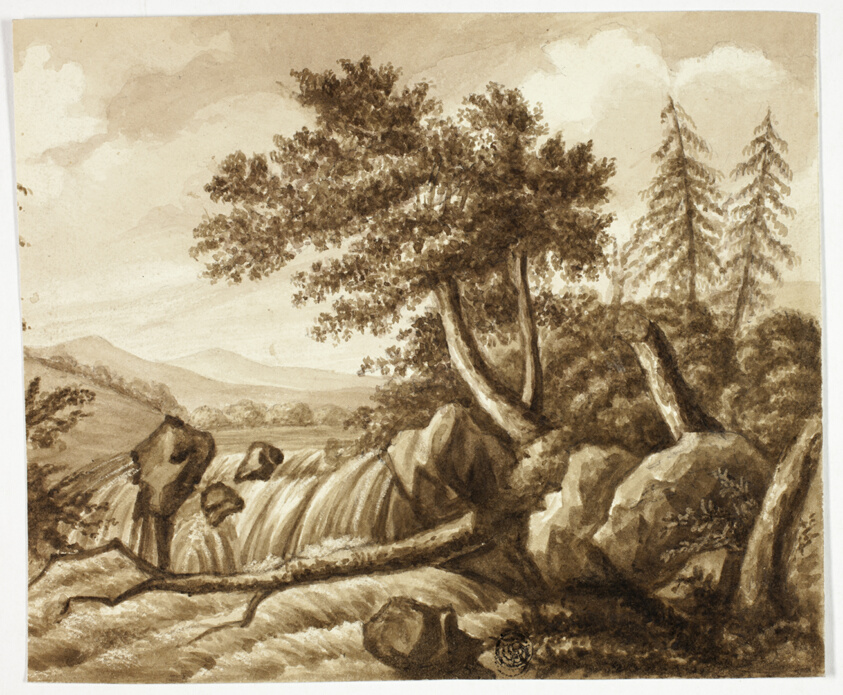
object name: Drawing and Watercolor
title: Waterfall in Rocky Landscape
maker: Octavius Oakley (English, 1800-1867)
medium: Brush and brown wash, with scraping, over graphite, on ivory wove paper, laid down on grayish-white wove paper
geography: United Kingdom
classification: ink or chalk wash; drawings (visual works); prints and drawing